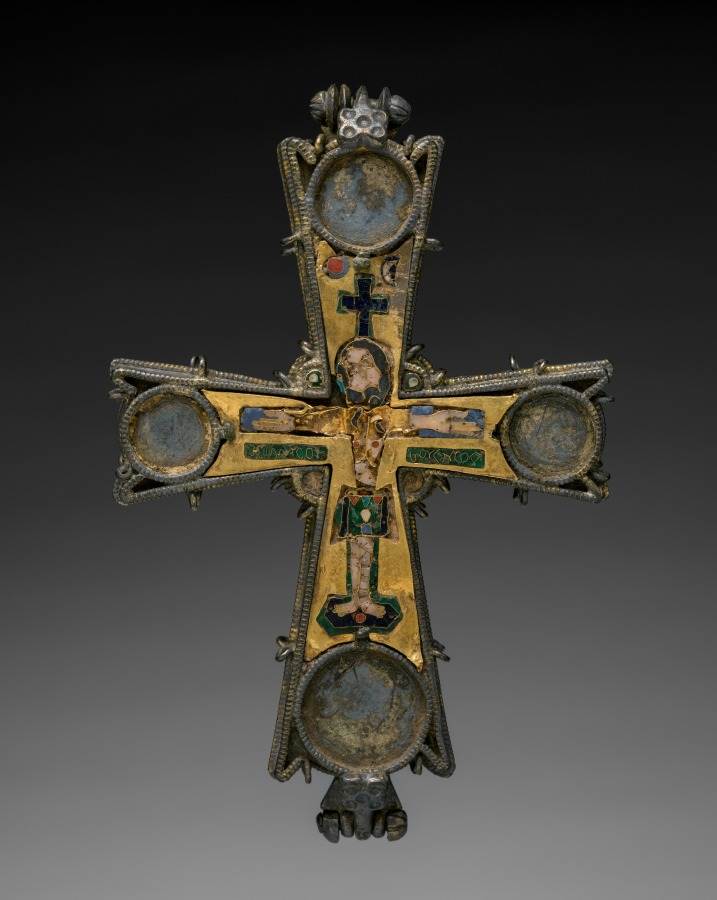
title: Pectoral Cross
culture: Byzantium, Constantinople, Byzantine period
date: 900s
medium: gold, gilt-silver, and cloisonné enamel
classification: Enamel